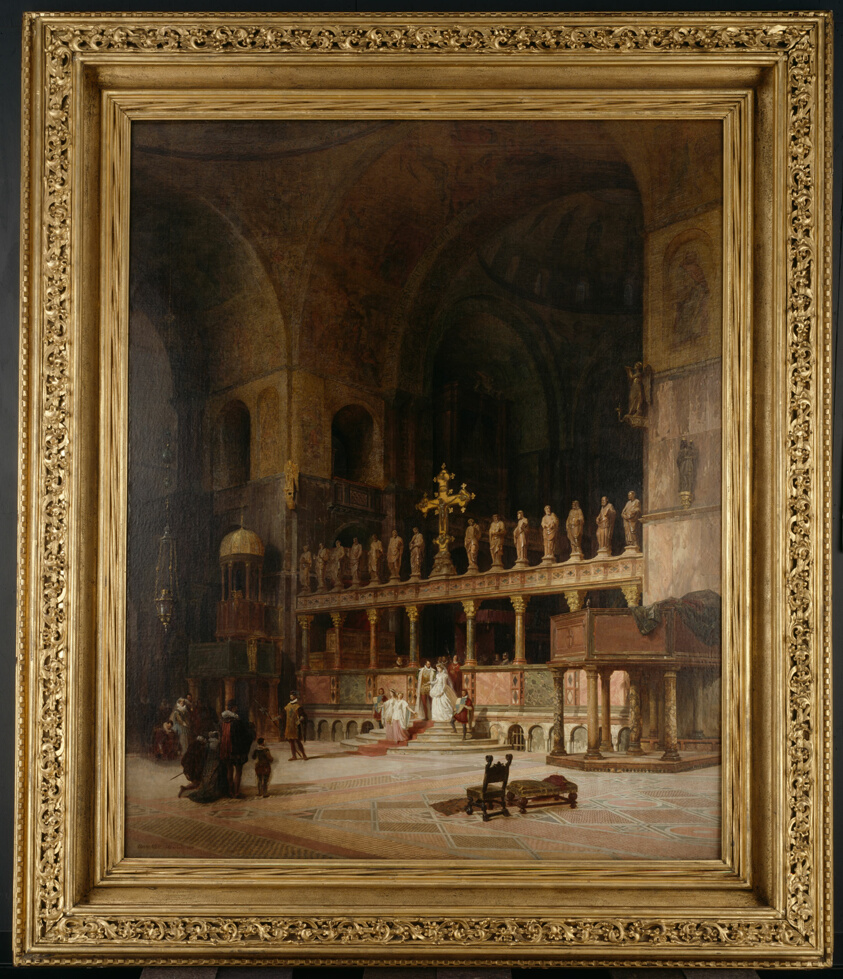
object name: Painting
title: Interior of St. Mark's, Venice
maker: David Dalhoff Neal (American, 1838–1915)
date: 1869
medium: Oil on canvas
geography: Munich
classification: painting; american arts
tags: interiors, architecture, religion, Venice, Italy, churches, cathedrals